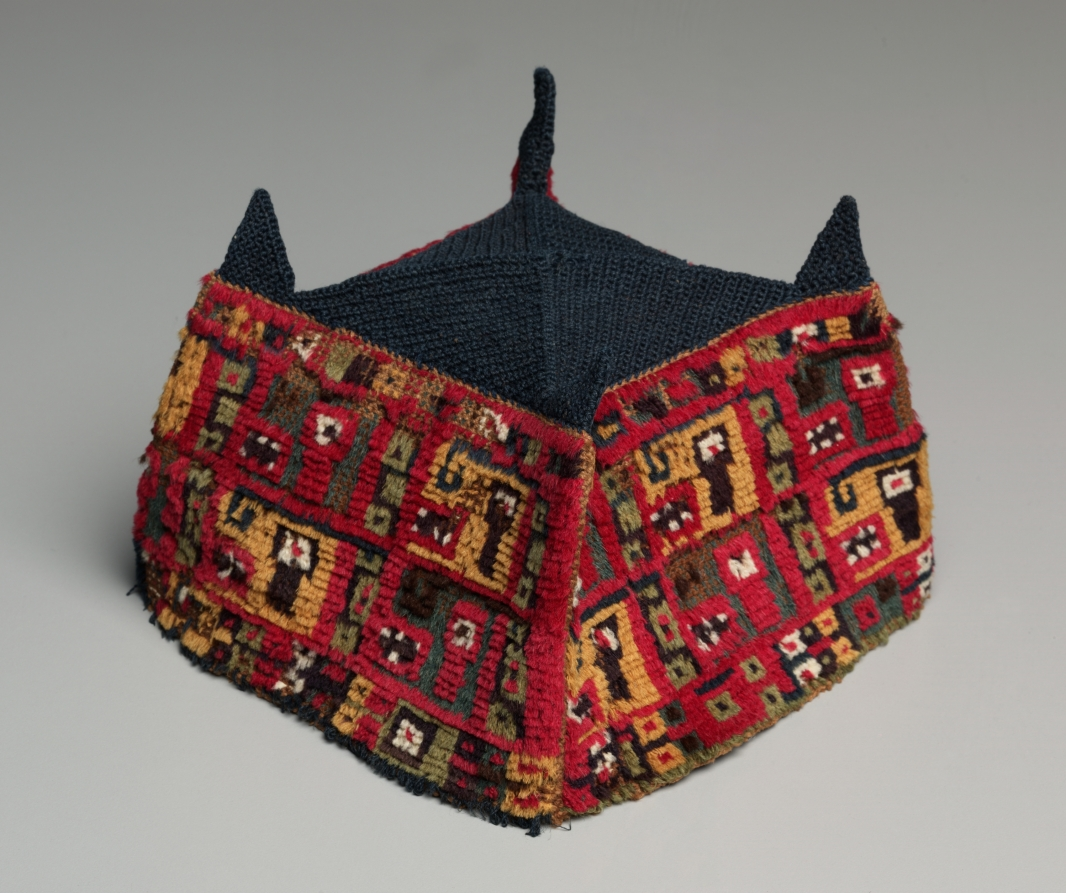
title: Four-Cornered Hat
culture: Peru, South Coast, Wari Culture, Tiwanaku Style, Middle Horizon, 8th-12th Century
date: c. 700–1100 A.D.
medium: needle network with and without cut pile: cotton and wool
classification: Textile